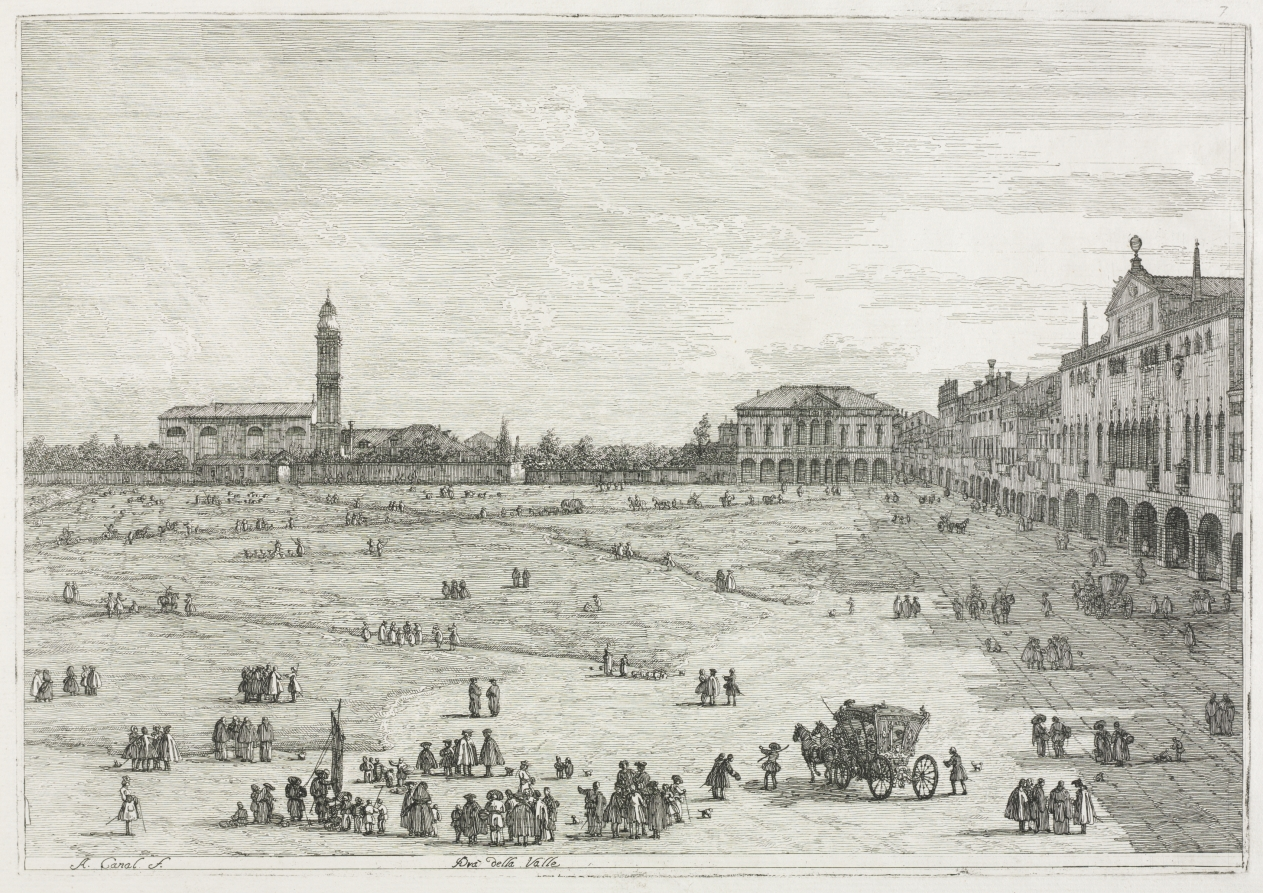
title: Views: Prà della Valle, Padua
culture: Italy, Venice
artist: Antonio Canaletto (Italian, 1697–1768)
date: 1735–1746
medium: etching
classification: Print